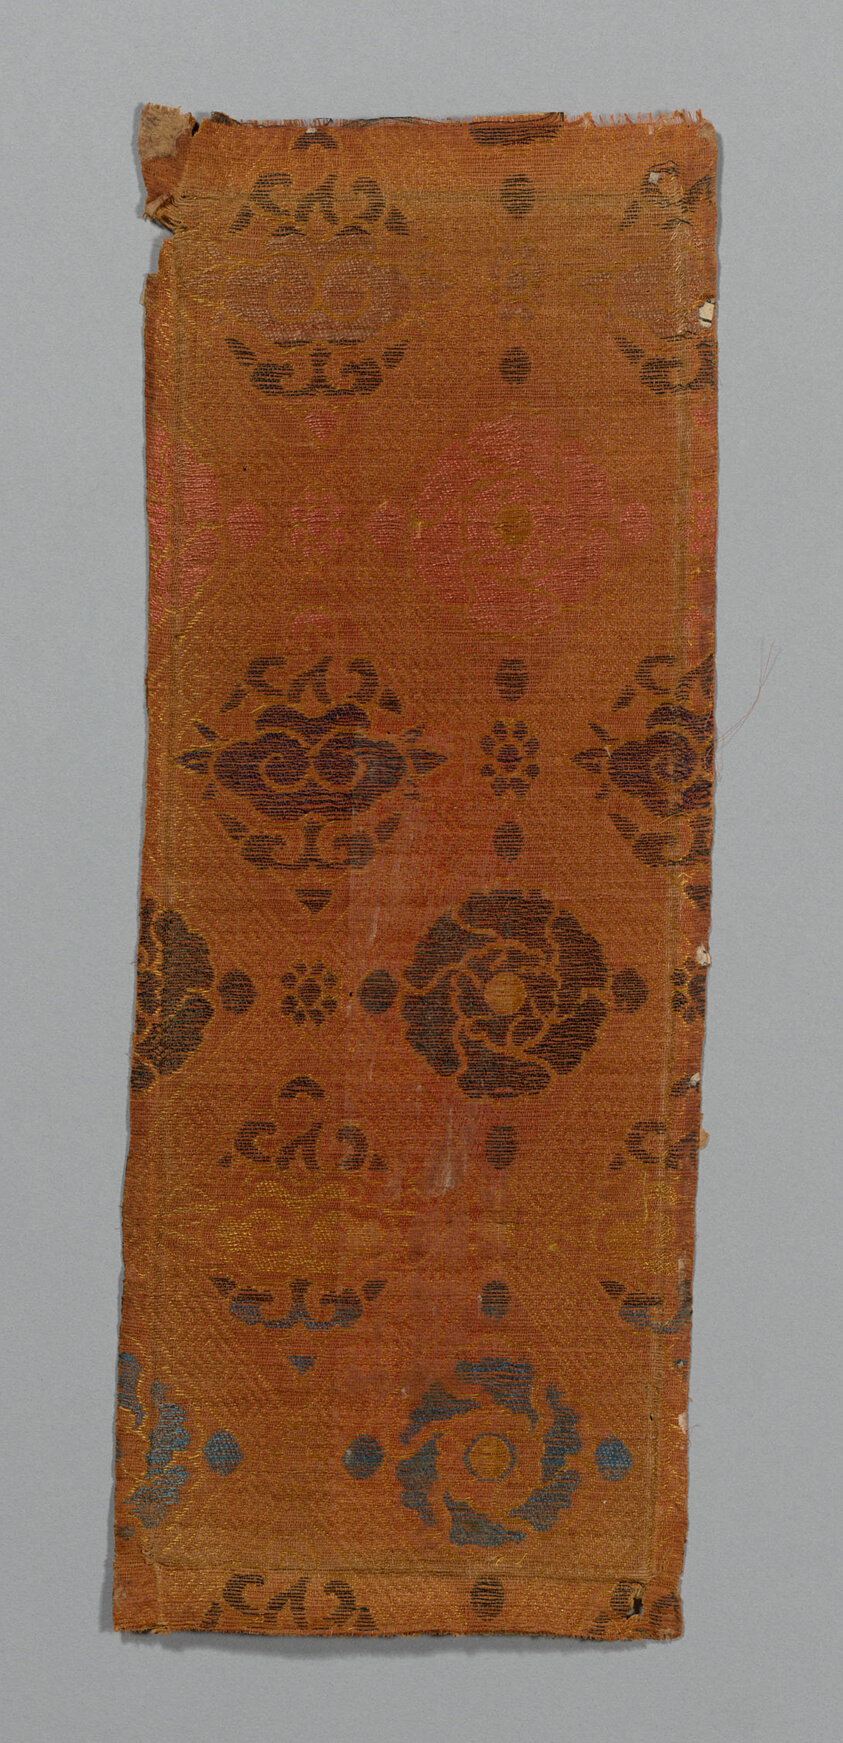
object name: Textile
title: Sutra Cover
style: ming, Chinese (culture or style), East Asian, asian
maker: China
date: Ming dynasty (1368–1644), c. 1590s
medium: Silk and cotton, warp-float faced 3:1 broken twill weave with supplementary patterning wefts some bound in weft-float faced 1:3 'S' twill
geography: China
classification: textile; weaving